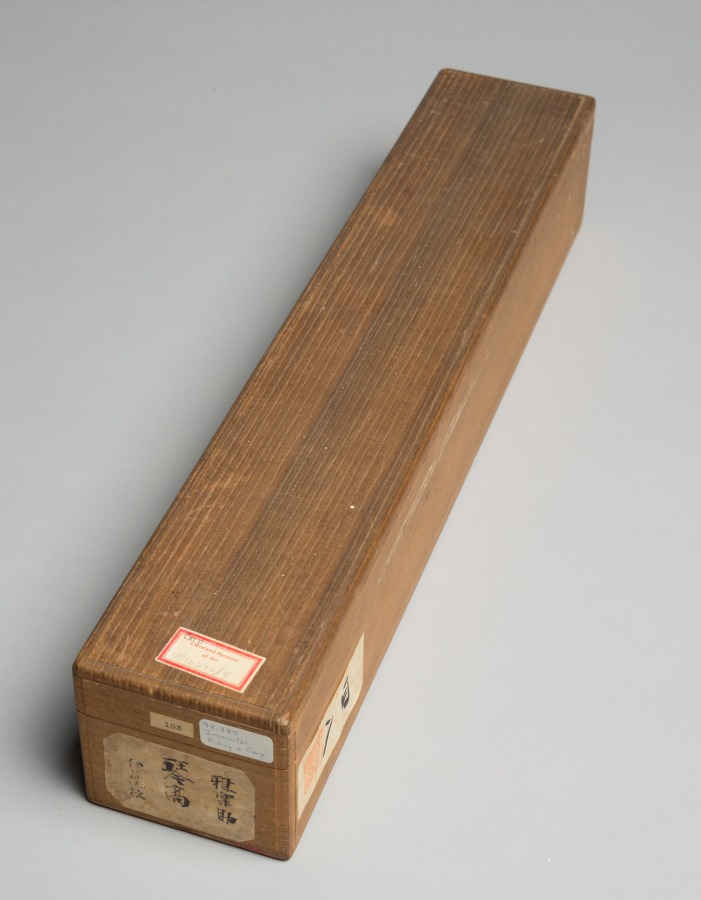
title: Immortal Riding on a Carp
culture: Japan, Edo period (1615–1868)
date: c. 1600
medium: hanging scroll; ink on paper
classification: Painting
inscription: seal of Motonobu ?